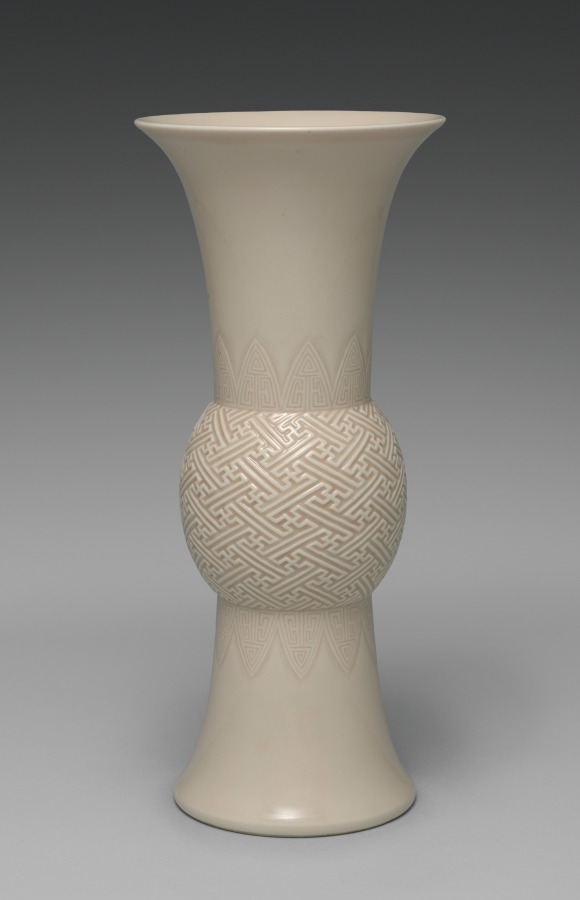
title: Gu-Shaped Flower Vase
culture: Japan, Meiji period (1868–1912)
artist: Seifū Yohei III (Japanese, 1851–1914)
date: 1893–97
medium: Glazed porcelain with molded and carved designs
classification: Ceramic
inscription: 大日本清風造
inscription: This gu-shaped vase has “cherry blossom glaze” (ōkayū), according to the inscription on its box.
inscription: A label affixed to the side of the box gives a sense of how previous owners conceived of the piece. Although the label is partially abraded, one can make out the character nezu 鼠, used in the names of numerous light pinks, from Naniwa pink (Osaka pink) to Miyako pink (Kyoto, or capital, pink). Also legible is the phrase hakugōrai, a broad term that can describe a shade of white associated with ceramics discovered in Korean tombs, but often applied to other ceramics of similar coloration, many from Chinese kilns, including Ding (J. Tei) ware of the Northern Song dynasty.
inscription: 清風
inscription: 帝室技芸員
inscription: 清風與平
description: Seifū Yohei III was the most prominent head of a ceramics studio in Kyoto that specialized in Chinese-style porcelains and especially items for use in sencha (煎茶), or the drinking of steeped-leaf tea with companions. Sencha was popular among the bunjin of Kyoto and Osaka, who often enjoyed it as part of their emulation of Chinese culture. While sencha was by design less formal than the Japanese tea ceremony, it still featured the display of treasured objects. Prized Chinese antiquities were generally unobtainable, so substitutes such as the Gu-Shaped Flower Vase were much in demand.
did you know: This gu-shaped vase has “cherry blossom glaze” (ōkayū), which Yohei III invented in 1890.